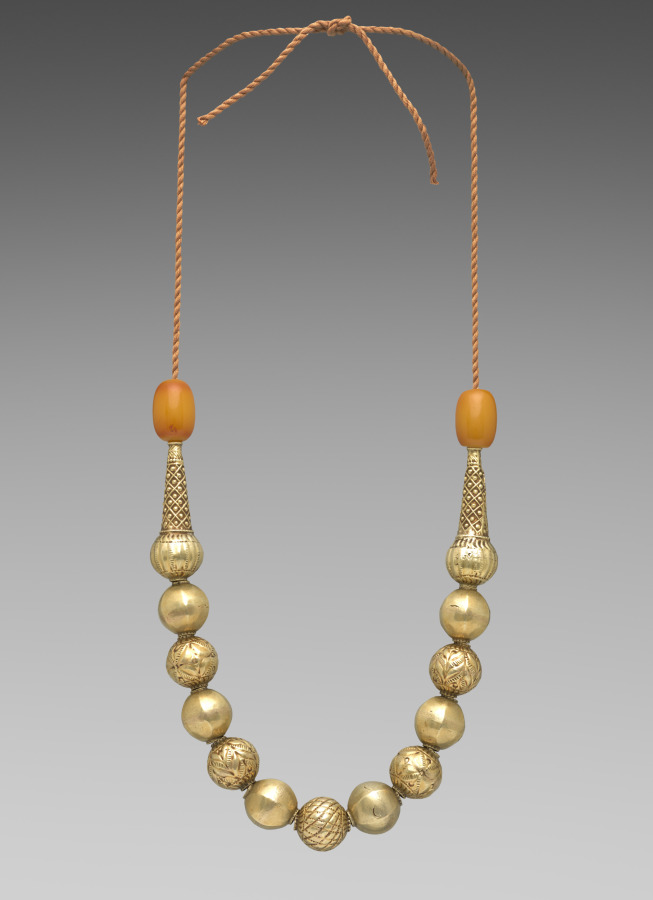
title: Necklace (muriya or murriyya)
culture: Africa, East Africa, probably Harar, Ethiopia, unknown silversmith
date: late 1800s or early 1900s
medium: gilt silver, tree resin (possibly copal)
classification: Jewelry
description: This necklace is from is from the Ethiopian city of Harar, where it was worn only by Muslim women. It was part of the bridal trousseau. The spherical silver beads of this muriya necklace resemble Muslim prayer necklaces. Its warm yellow Baltic amber or Zanzibari copal simultaneously conveyed the wearer’s married status and her access to imported goods. Ornate filigree jewelry was historically made in Ethiopia for royals and nobility by specialized silversmiths trained through long apprenticeships. Customers were generally female, while silversmiths are always male.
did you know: Besides archaeological examples, the oldest known Ethiopian jewelry dates from the 1840s; damaged items were typically melted down to make new pieces or to use during times of hardship.